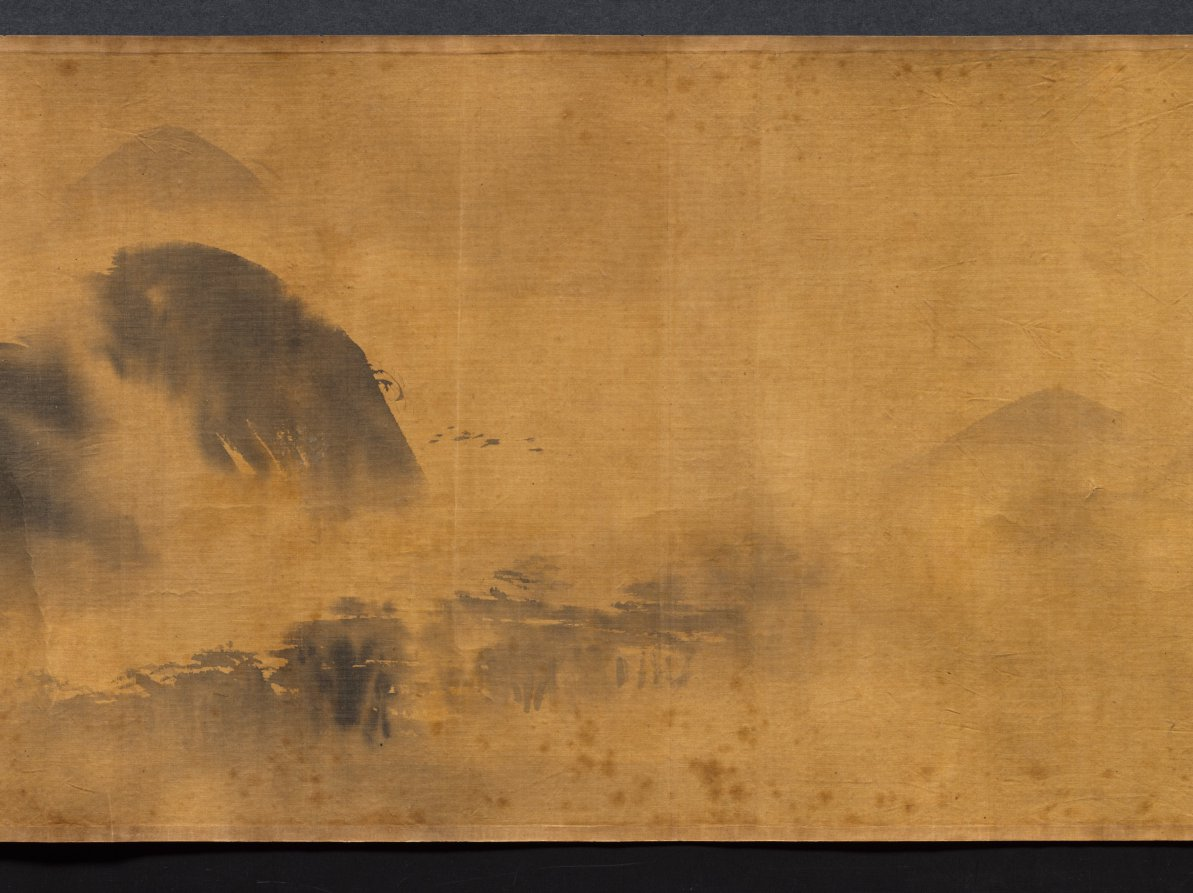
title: Eight Views of Xiao-Xiang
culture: Japan, Edo period (1615–1868)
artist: Kano Tan’yū (Japanese, 1602–1674)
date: 1615–1868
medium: handscroll; ink on silk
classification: Painting